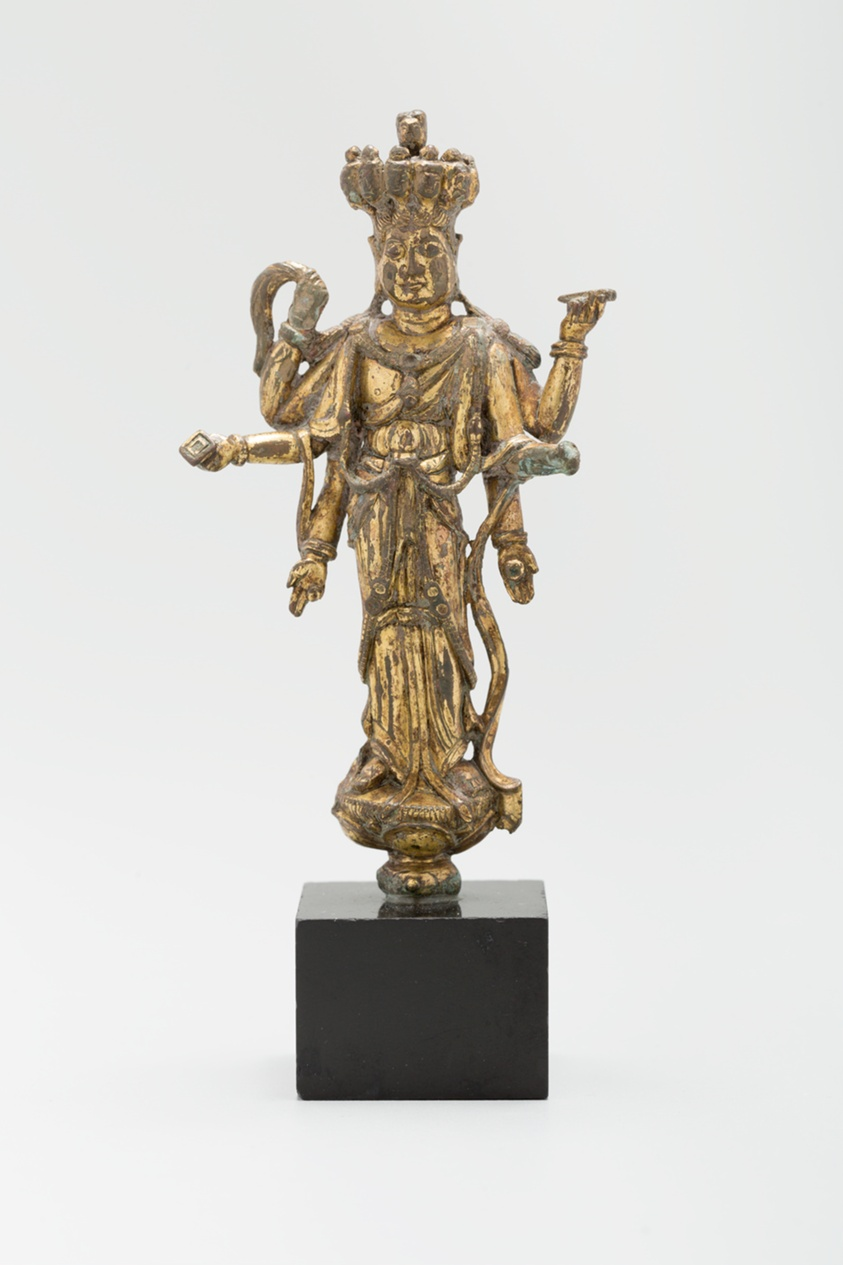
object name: Religious/Ritual Object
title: Eleven-Headed and Six-Armed Guanyin (Avalokiteshvara) Standing on a Lotus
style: Chinese (culture or style)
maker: China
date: Tang dynasty (618–907), c. 9th century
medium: Gilt copper alloy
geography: China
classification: bronze; metal; sculpture; asian art; ritual objects